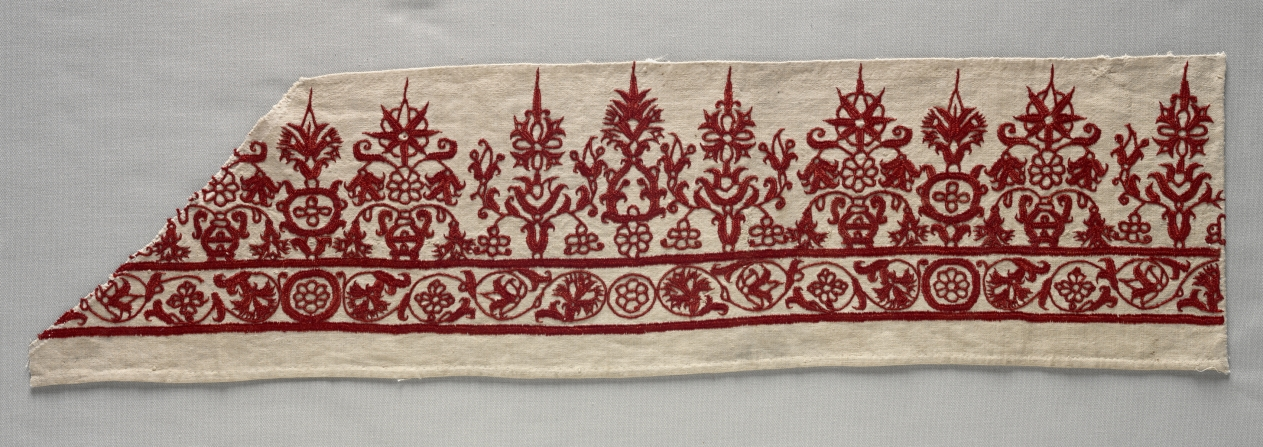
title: Part of a Skirt Border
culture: Greece, Crete, 19th century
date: 1800s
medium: embroidery: silk on linen tabby ground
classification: Embroidery